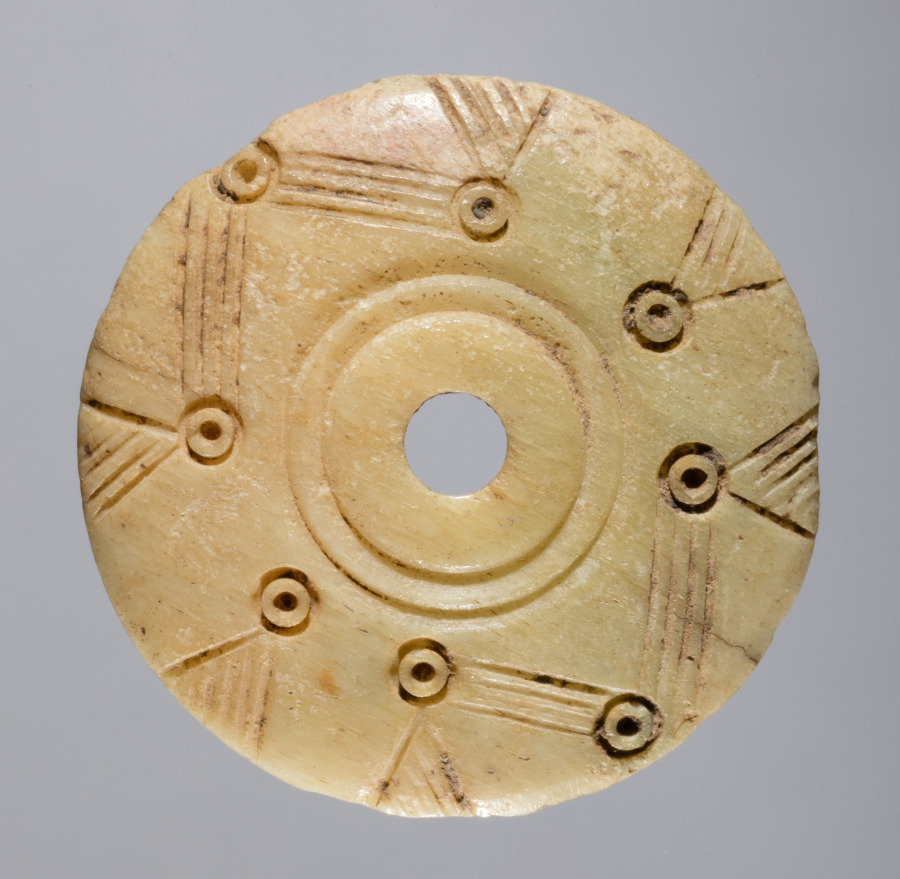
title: Spindle Whorl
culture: Iran, early Islamic period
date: 700s - 900s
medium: bone, incised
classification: Spindle Whorl